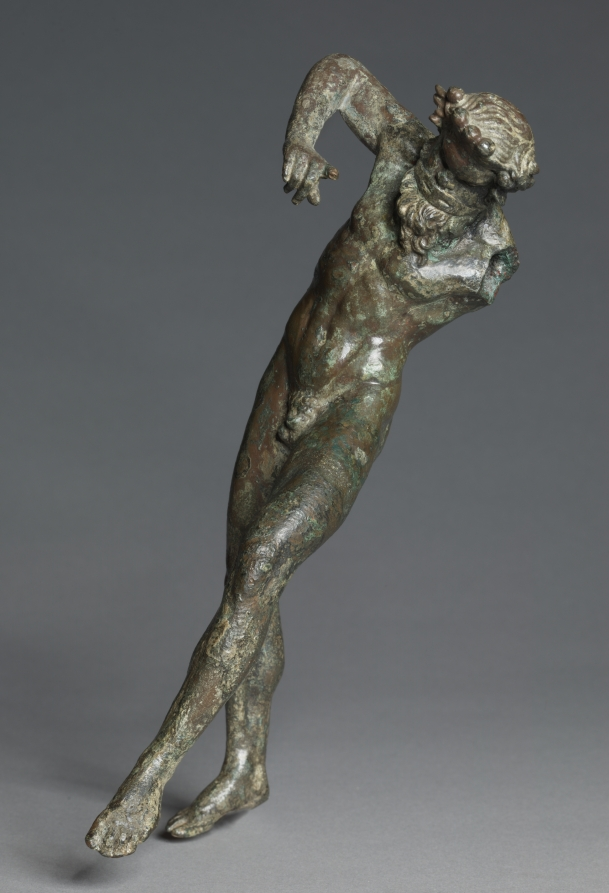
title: Piping and Dancing Satyr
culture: Greece, Alexandria(?)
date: 300–100 BCE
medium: bronze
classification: Sculpture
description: With its long limbs and unbalanced pose, this bronze statuette captures a male figure in the middle of a dance. His pointed ears, snub nose, and berry crown mark him as a satyr, a part-man, part-horse follower of Dionysos, the Greek god of wine and revelry. He probably once held auloi (musical pipes), to judge from the placement and shape of his right hand, plus the strap around his mouth; his left arm is now missing. Composed of multiple cast pieces joined together, the dynamic pose of this statuette shows the Hellenistic interest in movement and the body.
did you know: The special strap around the satyr’s mouth to help him play the pipes is called a phorbeia.